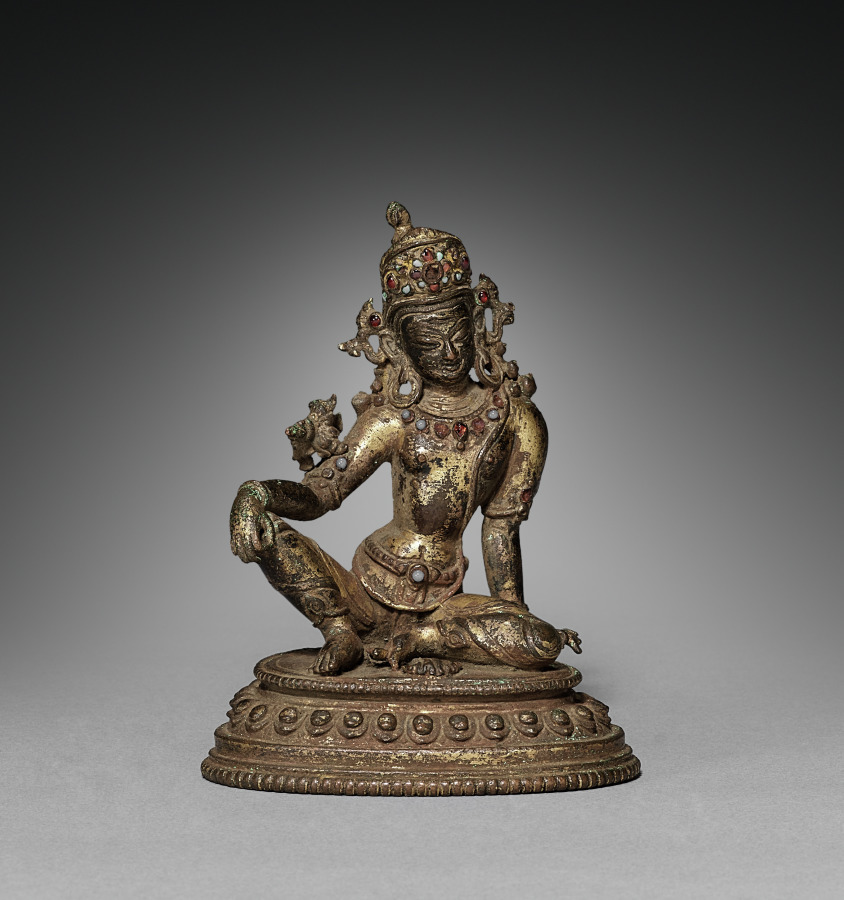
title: Avalokiteshvara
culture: Nepal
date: 1300s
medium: gilt bronze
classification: Sculpture